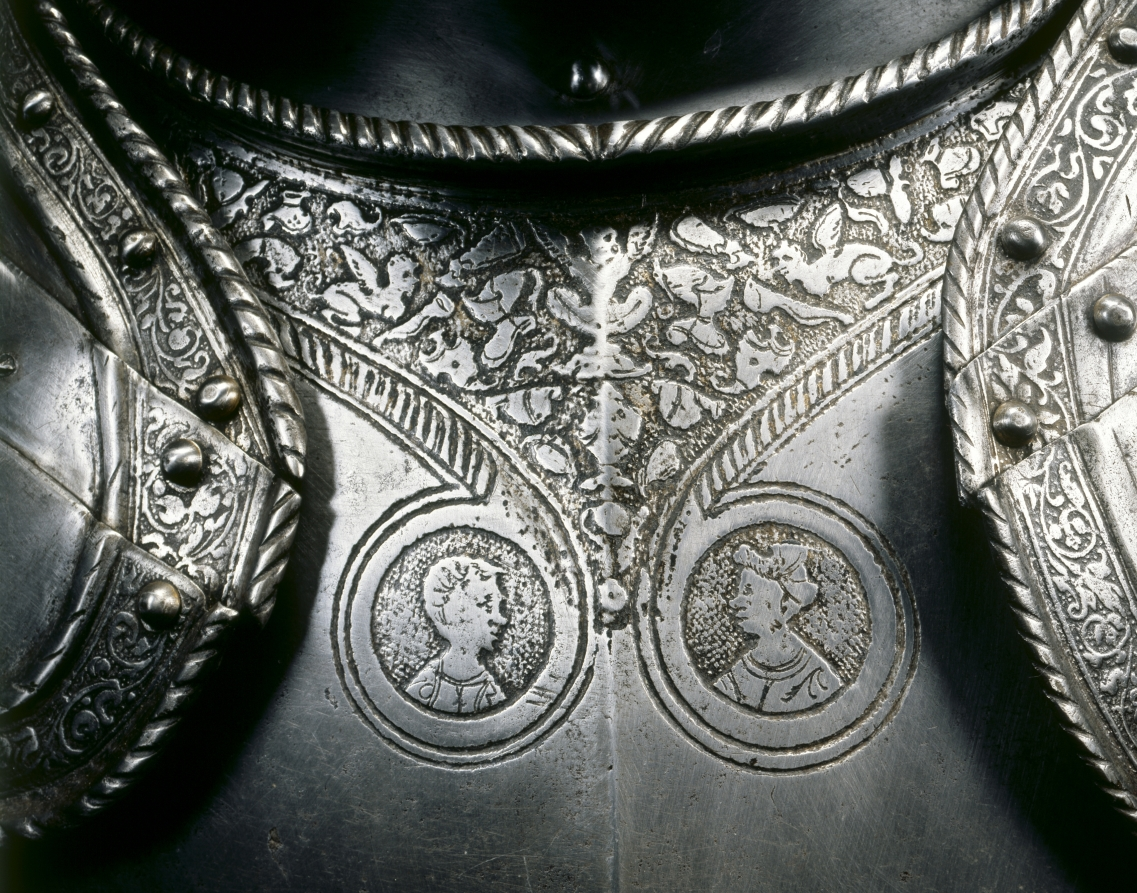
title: Half-Suit of Armor for the Field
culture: North Italy, Brescia (?), 16th century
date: c. 1575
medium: steel with etched decorative bands and roundels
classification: Arms and Armor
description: Decoration was critical to fine armor, and etching was the most commonly used technique. Here, the bands along the borders are etched. On the breastplate, pauldrons (shoulder guards), and tassets (hip and upper leg guards), etched medallions enclose profile busts reminiscent of ancient Roman portraits. The lance rest on the breastplate indicates that this half-suit was once part of a complete field armor for man and horse. The etching technique used for armor was developed in the late 1400s. The metal surface was first coated with an acid-resistant substance, such as wax or varnish. An etching needle was then used to scratch a design into the surface. The exposed areas were then treated with an acid that would "bite" or etch the lines into the metal. When the coating was removed, the etched design was blackened for contrast.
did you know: This is an example of raised field etching where the design stands out in slight relief from the background.